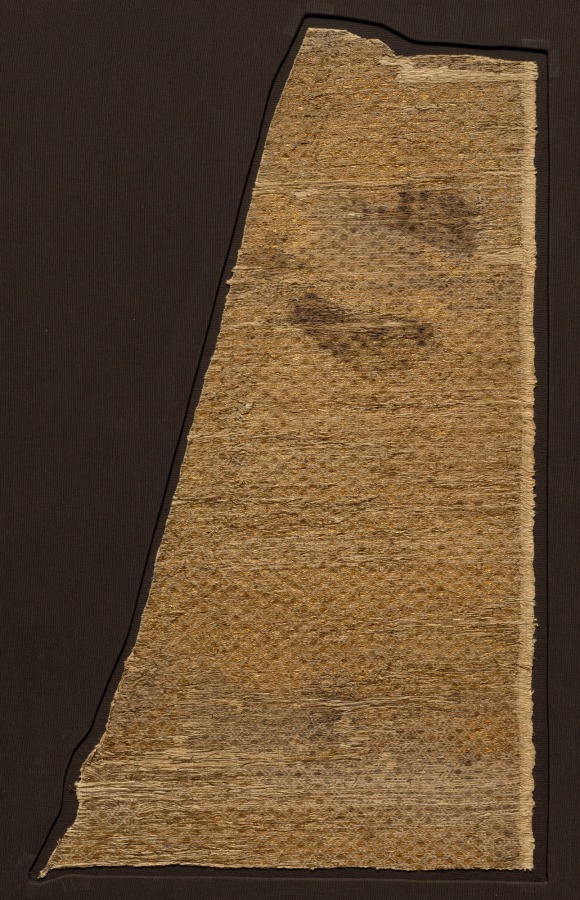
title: Textile with Diamonds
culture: Central Asia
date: 1000s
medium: silk, cotton, and silver thread: tabby with supplementary weft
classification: Textile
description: Few Central Asian luxury silks dating from the 900s–1000s have survived. Here the cotton wefts, together with thin, widely spaced silk warps, identify this example as Central Asian. Its date has been determined by comparing it with two related textiles that are securely dated. At this time Chinese silks with small-scale diamond patterns were usually reserved for undergarments or linings. The use of silver thread for the tiny diamonds in this example, however, may indicate that in Central Asia the design had greater importance. Over time, this textile made its way to Europe, where it was preserved in a church treasury. Because such textiles were expensive, rare, and sometimes associated with saints, they were highly valued regardless of their condition.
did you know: A complete selvage is preserved along one side of the fragment.